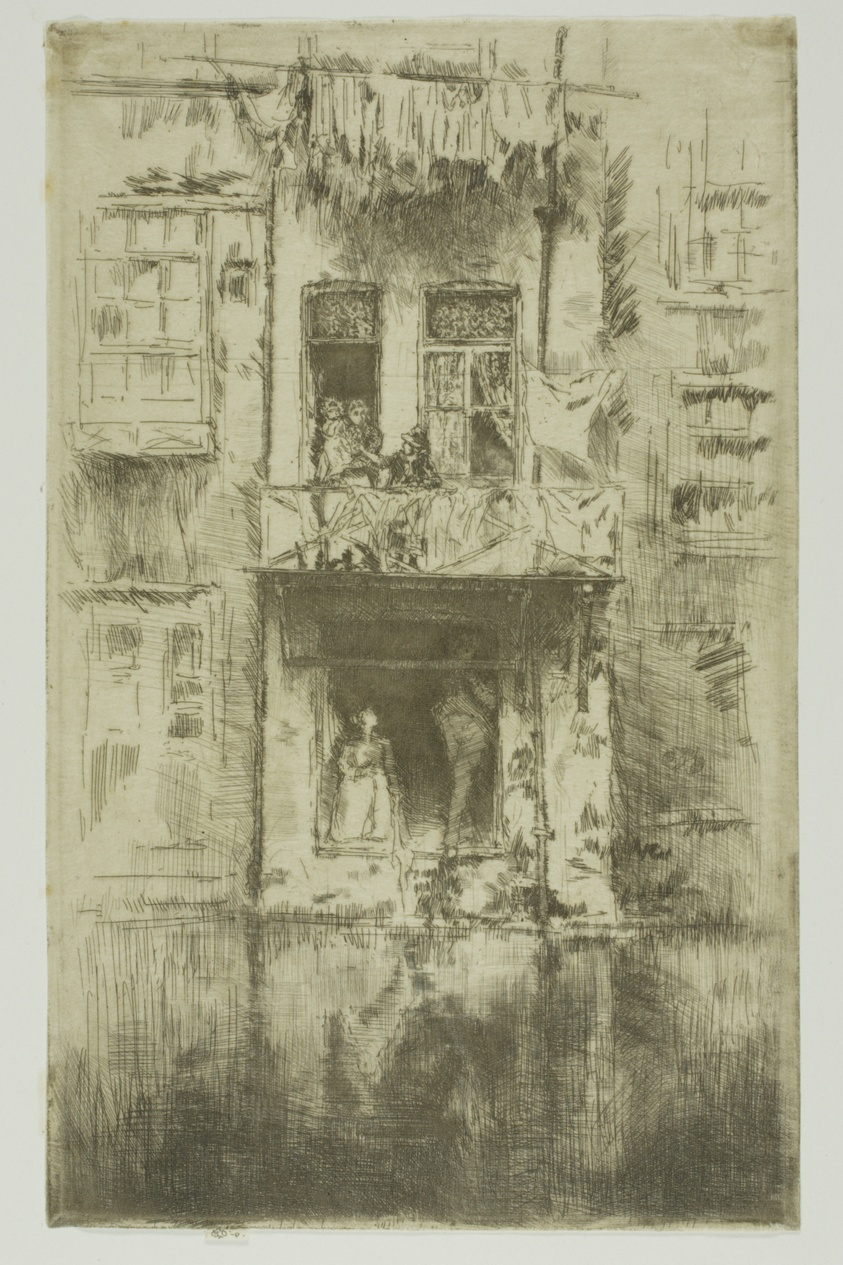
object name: Print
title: Balcony, Amsterdam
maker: James McNeill Whistler (American, 1834-1903)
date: 1889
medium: Etching and drypoint in black ink on ivory Japanese paper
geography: United States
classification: etching; drypoint; print; prints and drawing; paper